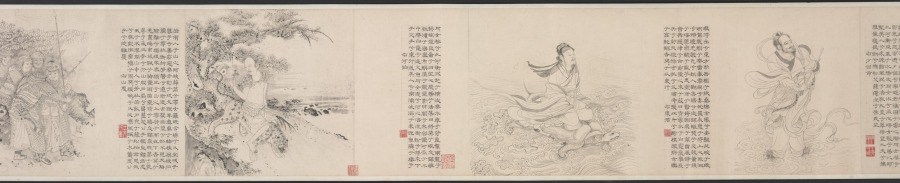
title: Nine Songs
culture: China, Yuan dynasty (1271-1368)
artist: Zhang Wo (Chinese, active c.1336–after 1364)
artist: Chu Huan (Chinese, active 1361)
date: 1361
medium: handscroll; ink on paper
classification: Painting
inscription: 7 colophons and 47 seals: 1 colophon, dated 1361, and 28 seals of Chu Huan 褚奐 (active c. 1361); 1 colophon, dated 1785, and 1 seal of Lu Shihua 陸時化 (1714-1779); 2 seals of Lu Yü-ch'ing (18th c.); 1 colophon, dated 1935, of Ye Gongchuo 葉恭綽 (1881-1968); 1 colophon, dated 1935, of Wu Hufan 吳湖帆(1894–1968); 1 colophon, dated 1938, and 1 seal of Wang Tongyu 王同愈 (1856-1941); 1 colophon, dated 1941, of Wu Huayuan 吳華源 (1893-1972); 1 colophon, dated 1942, and 9 seals of Xu Bangda 徐邦達 (1911–2012); 1 colophon, dated 1942, of Lang Jingshan 郎靜山 (1892-1995); 1 colophon, dated 1944, of Tang Yun 唐雲 (1910-1993); 6 seals of Wang Jiqian [C.C. Wang] 王季遷 (1907–2003).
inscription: Text of The Nine Songs written by Chu Huan at the end of each section.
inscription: 右離騷九歌圖，宋龍溟居士李公本，淮南張渥叔厚所畫妙絕當世。家藏請予書其辭目識于左。至正二十一年辛醜三月旦河南褚奐記。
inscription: Colophon by Lu Shihua 陸時化 (1714–1789): This scroll is fortunate to have been handed down from collections of the right people. Now, after 500 years, its condition is as good as when it was painted. I acquired this from Mr. Shen Guiyu [1673-1769], the President of the Board of Rites. The label is in his handwriting when he was 95 years old. I submit that Chu Huan (t. Shiwen) of the Yuan Dynasty was a native of Qiantang. His "seal" and li writings are in the style of Wu Rui. For example, in [Chu Kuei's] Ming ji lu [A list of masterpieces] is recorded the stele commemorating the restoration of the prefectural school of Kun-shan, the text of which was composed by Yang Weizhen in the twenty-first year of Zhizheng [1361]; and the calligraphy as well as the title in li style was by Chu Huan, who was at that time an assistant judge of the prefecture of Haining in the circuit of Hangzhou. Zhang Wo's zi is Shuhou (叔厚). His literary name is Zhen Qisheng (贞期生). According to [Gu Ying's] Yu shan cao tang ya jii, he liked to paint in the bai-miao or the "pure delineation" style after the method of Li Longmian [Li Gonglin 李公麟], which finds no peer among the ancient masters. This is agreed upon [by Pei Ch'iung] in his Qing jiang zhi who praised [Zhang Wo] as being quite learned and well-versed in many branches of the arts, especially figure painting. Recorded by Lu Shihua [The mountain dweller], listening to the pine, in the twelfth month of the yisi year [1785].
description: Painted in the baimiao, or fine-line drawing style, this ancient work demonstrates the literati’s use of abstract calligraphic brushwork for self-expression. The subject of the “Nine Songs”—songs associated with shamanistic rituals in the ancient Chu kingdom—had traditionally provided artists with myths and legends that they could explore and reinterpret in their own works.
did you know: Divided into eleven sections, the scroll contains illustrations by painter Zhang Wu followed by a transcription of the relevant verse by calligrapher Chu Huan.